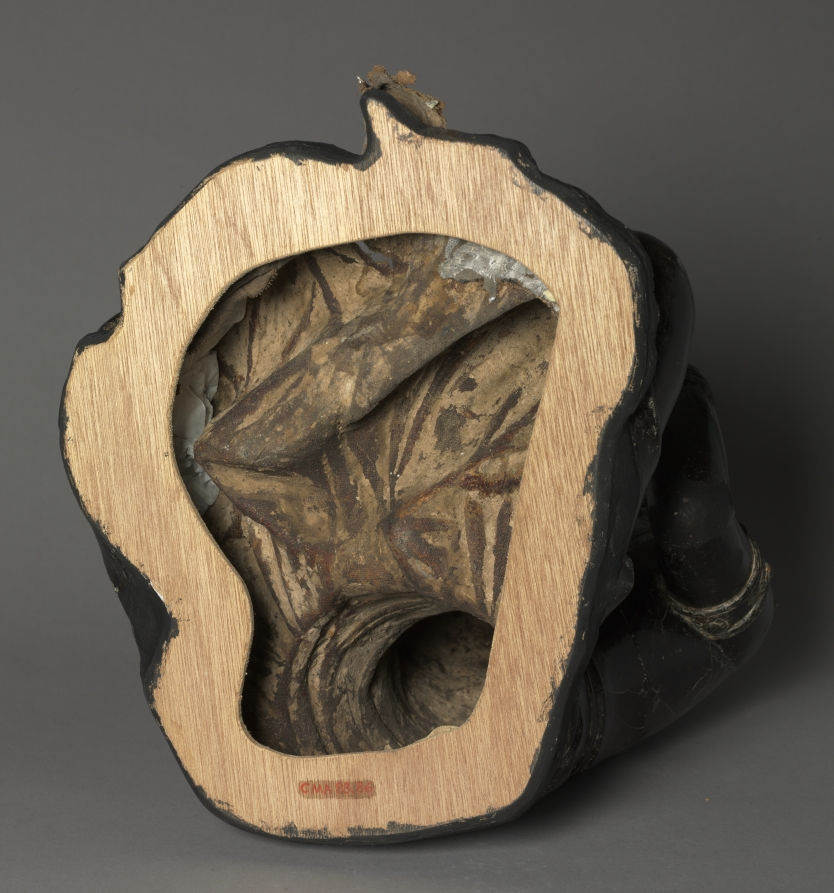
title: Bodhisattva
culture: China, Tang dynasty (618-907)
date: 700s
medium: dry lacquer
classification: Sculpture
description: The bodhisattva, an enlightened being dedicated to the spiritual awakening of all beings, is shown sitting in a relaxed pose, the eyes half-closed in an expression of profound meditation. The statue is modeled in a sensuous manner. It is made using the dry lacquer technique whereby a clay core is first constructed and then overlaid with fabrics saturated with lacquer. Once the lacquer layers are set, the core is removed. This kind of hollow dry lacquer statue is lightweight and easy to carry. The piece once suffered from severe surface retouching that distorted its original beauty. The museum's conservation work has removed coats of overpainting and over-restoration, revealing the true appearance of the glossy black lacquered surface with traces of cut-gold decoration and pigments.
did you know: While lacquer is tough and impervious to insects, it is less durable than wooden or stone sculptures, so this is a rare surviving Tang example.